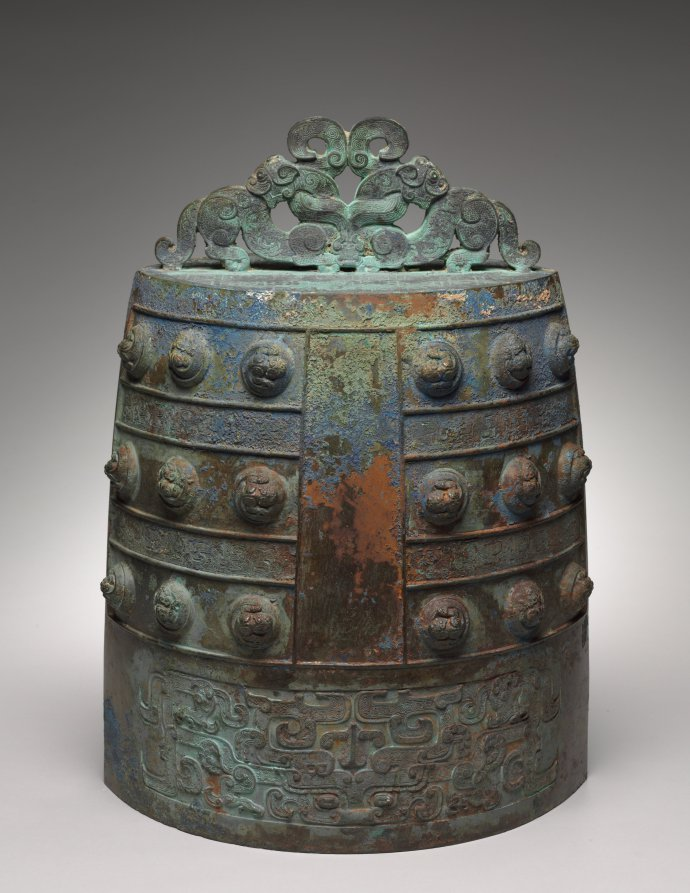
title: Bell (Bo Zhong)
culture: China, Eastern Zhou dynasty (770–256 BCE)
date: early 400s BCE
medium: bronze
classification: Metalwork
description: Music in the Eastern Zhou dynasty not only served ritual purposes but also provided entertainment in feudal courts. The elliptical cross-section of the Chinese bronze bell is unique; it could produce two notes depending on where the bell is struck, either at the rim or near the center. The bell is suspended when played and often belongs to a graduated set arranged according to pitch and size. This bell displays elaborate ornamentation and exquisite workmanship. A twin-bodied serpent intertwined with two tigers forms the suspension loop at the top. Coiled serpents form the knobs on the body. The lower part bears an animal mask, its horns interlaced with abstract bird designs.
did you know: The bell could produce two notes depending on where it is struck.